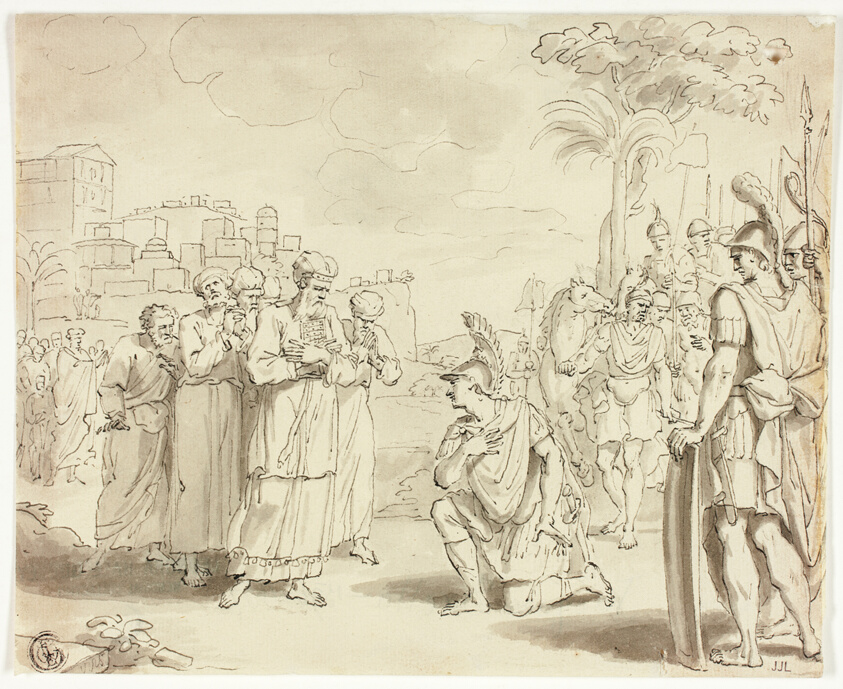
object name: Drawing and Watercolor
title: Alexander Before Highpriest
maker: Jacques Stella (French, 1596-1657)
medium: Pen and gray ink, with brush and gray wash, over traces of graphite, on cream laid paper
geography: France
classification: pen and ink drawings; drawings (visual works); prints and drawing